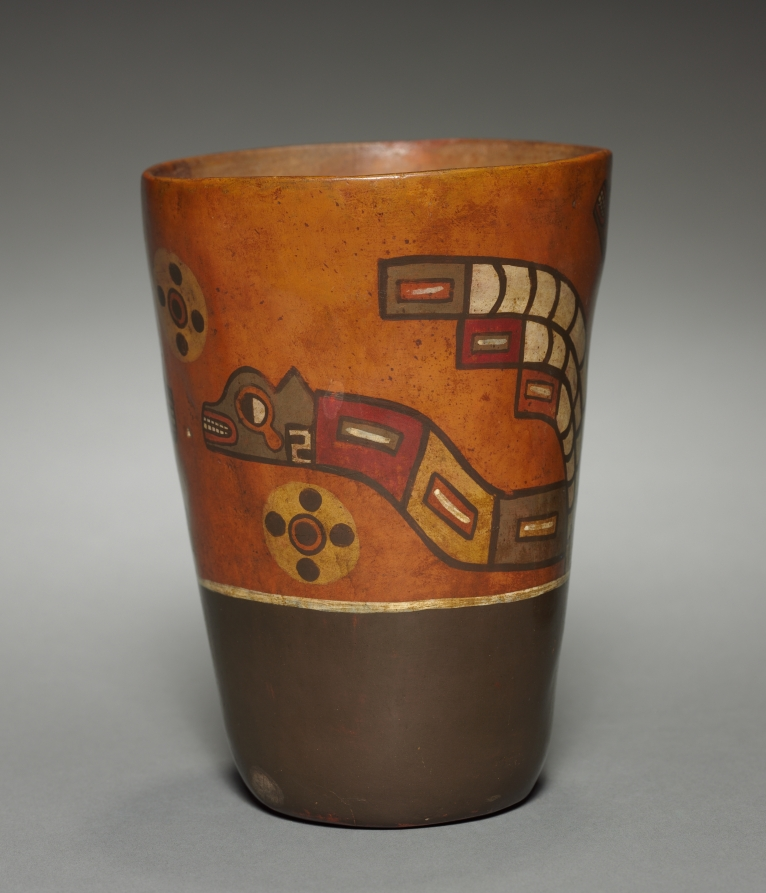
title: Kero-shaped Vessel (modern version of a Wari-style vessel)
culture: Peru, modern, 20th century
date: before 1955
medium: pottery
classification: Forgery